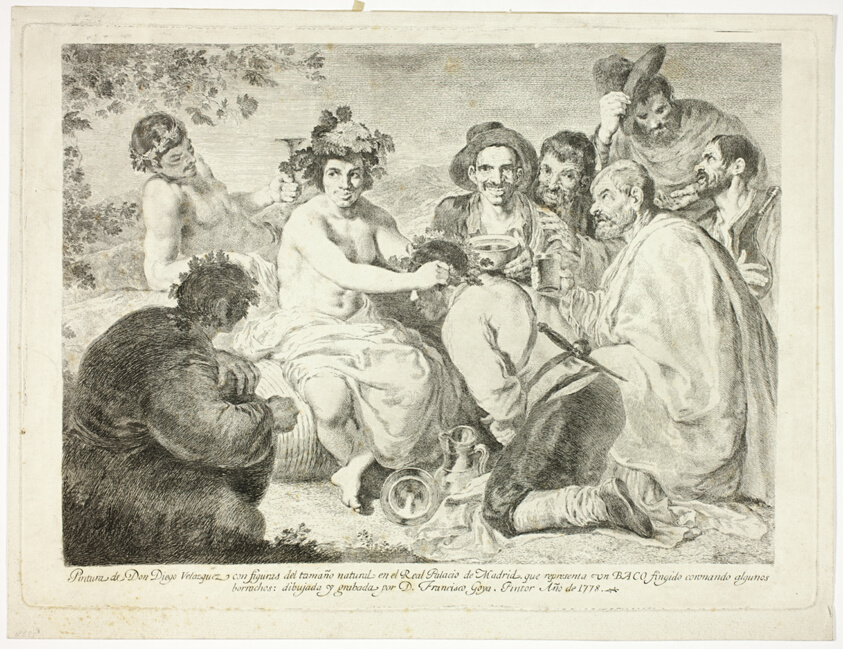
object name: Print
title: The Drunkards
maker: Francisco José de Goya y Lucientes (Spanish, 1746-1828); after Diego Velázquez (Spanish, 1599-1660)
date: 1778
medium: Etching with engraved inscription on ivory laid paper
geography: Spain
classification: etching; print; prints and drawing